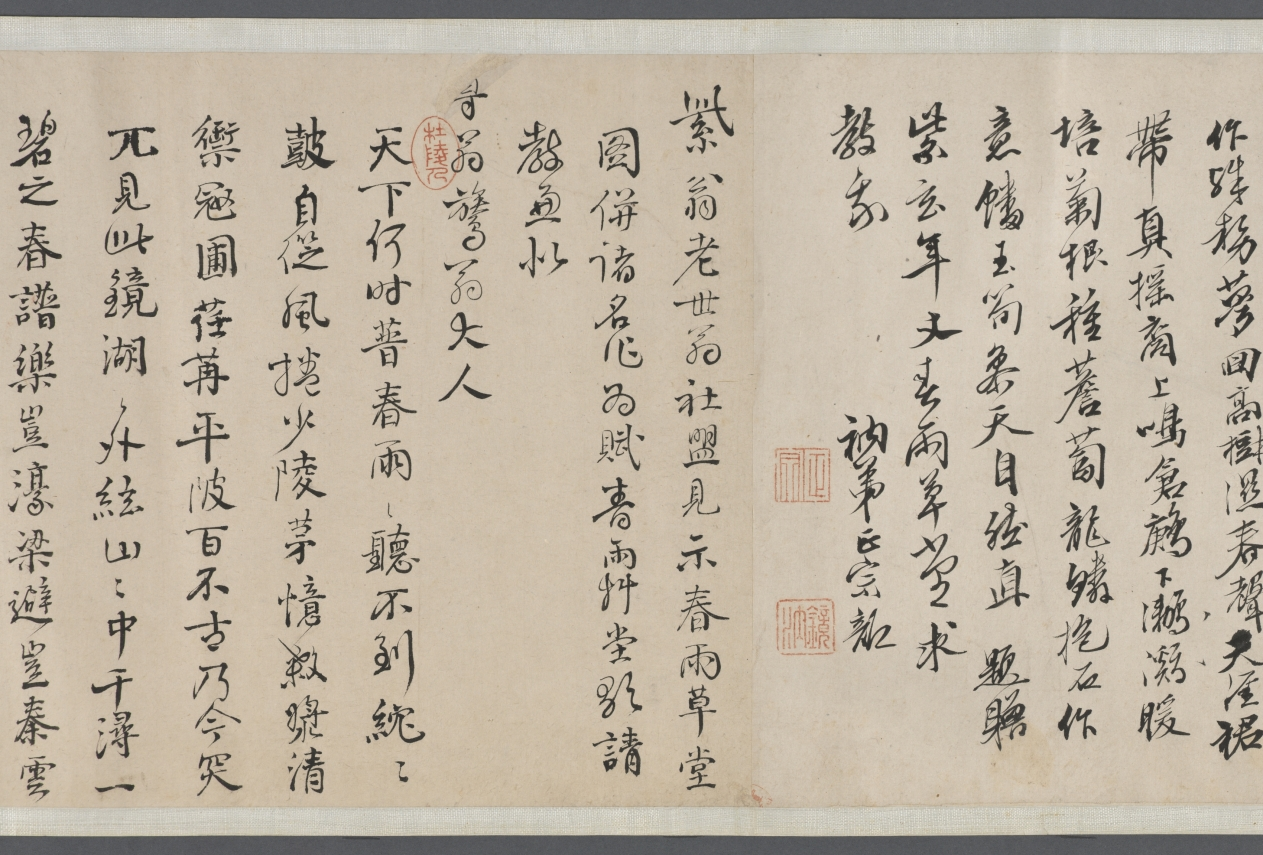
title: Spring Rain Thatched Hut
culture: China, Qing dynasty (1644-1911)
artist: Wang Jianzhang (Chinese, active 1621–1662)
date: 1650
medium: handscroll, ink on paper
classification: Drawing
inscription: Title by Wu Zhiying 吳芝瑛 (1868–1933), dated 1910.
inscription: 春雨草堂圖。庚寅仲春，為紫玄社兄畫於若耶溪上。 仲初王建章。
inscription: 12 colophons by Gong Weiliu’s 宮偉鏐 (1611–1680) contemporaries: Fang Gongqian 方拱乾 (1596–1667, jinshi of 1628); Jiang Cai 姜埰 (1607–1673); Liang Yizhang 梁以樟 (1608–1665); Du Shaokai 杜紹凱 (also named Du Jie 杜岕, 1617–after 1689), dated 1648; Zhao Kaixin 趙開心 (d. 1663), dated 1647; Zhao Erbian 趙而忭 (d. 1658); Yu Yaoguang 余耀光, dated 1649; Yao Quan 姚佺, dated 1648; Chen Taisun 陳台孫 (b. 1611, jinshi of 1640); (Monk) Shao 韶; Du Zhujin 杜祝進; and Tang Shi 唐時.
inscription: 此研田莊居士王建章為先太史紫元公所作春雨草堂圖也。居士字仲初，明崇禎間人，與先太史及惲香山相友善。喜畫佛像，自謂不讓李公麟。山水祖述董源，筆力雄健，有不可羈勒之概。香山稱其墨有五采，非世人所知。然性廉重，非同志不輕落筆，人得其寸圖尺縑，必相與忻賞，如獲蜼彝兕敦，非人世間物也！見先太史筆記，此圖寫雨景，而氣韻生動，勃勃於不能止。每一展覽，覺滿紙雲烟，墨瀋猶濕，如寫吾先人胸中未盡之邱壑也。圖後題詠，多一時名手，想見文采風流之盛。迄今二百餘年，舊德先疇，遺風未沫。吾子孫其永寶之，如與吾先人接謦咳於一堂，為感思之助，其敢作圖畫觀乎！同時香山亦有圖佚去己久，不知異日能為延津之合否。壬申長夏本昂重裝敬識。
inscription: Collectors' seals including: Gong Ben'ang 宮本昂 (1821–1874); Lian Qian 廉泉 (1868–1932); Wu Zhiying 吳芝瑛 (1868–1933)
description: With its striking simplicity, this painting captures the pure serenity of a private garden in the moist atmosphere of a spring morning on a small river. Painted in the style of Ni Zan, Wang Jianzhang dedicated this work to his patron-friend Gong Weiliu (1611-1680). Gong retired from government service after the fall of the Ming dynasty and constructed a garden-retreat at his native home in Taizhou, Jiangsu province. He invited scholars and poets from his literary society to contribute writings of his estate, which are here mounted together with the painting in this scroll.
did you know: Gong Weiliu, the owner of the estate portrayed here, had received his prestigious jinshi degree in 1643, but his official career was thwarted by the collapse of the Ming dynasty the following year.